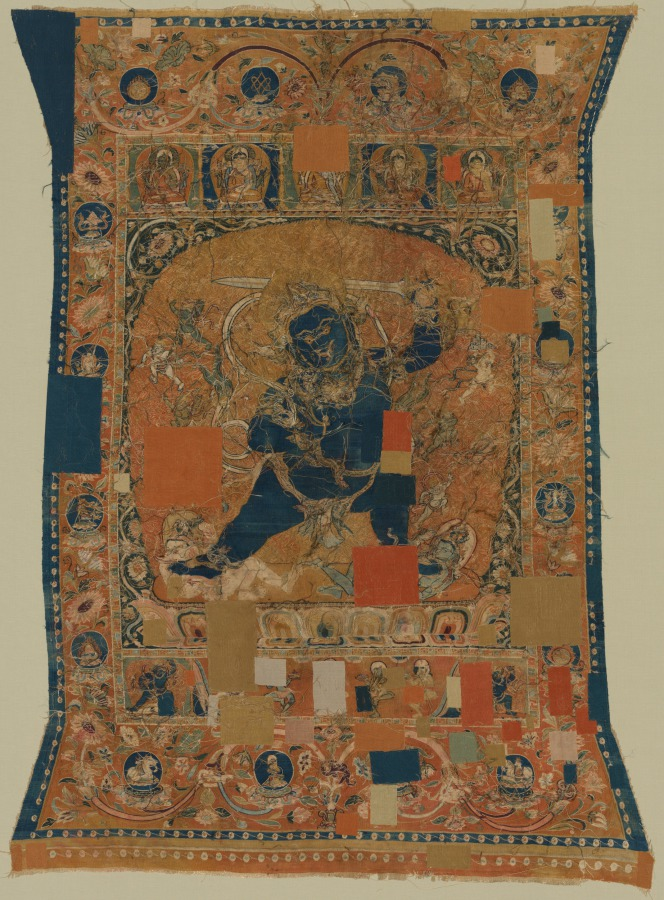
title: Achala, King of the Wrathful Ones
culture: China, Zhejiang Province, probably Hangzhou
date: early 1200s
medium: Thangka, silk tapestry with pearls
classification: Textile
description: The powerful blue body of Achala, meaning “immovable,” dominates the composition. He holds a sword to cut through ignorance and a noose for catching illusions that plague the path to enlightenment. Small personifications of furious destroyers of illusion (maya) emanate from him on either side, each with his own weapon. This image expresses what advanced practitioners would visualize in meditation rituals, as explained in Buddhist texts called tantras. Woven with a sophistication matched only by products of the Hangzhou looms, this devotional tapestry made its way to Khara-Khoto, capital of the Tangut Empire located in present-day Mongolia and Central Asia, where tantric Buddhism was prevalent.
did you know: The elephant-headed figure under his left foot is a demonic divinity, a yaksha, who creates obstacles to enlightenment.